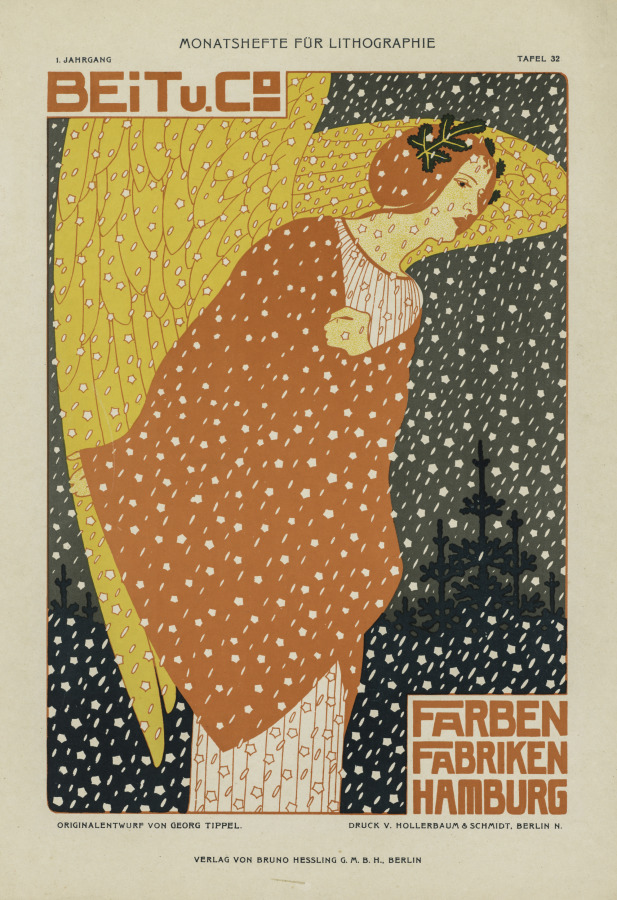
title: Angel in the Snow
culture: Germany, 19th-20th century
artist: Georg Tippel (German, 1875–1915)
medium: color lithograph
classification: Print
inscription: In plate, above image (L to R): 1. Jahrgang, Monatshefte Fur Lithographie, Tafel 32; in plate, below image (L to R): Originalentwurf von Georg Tippel, Druck V. Hollerbaum & Schmidt, Berlin N.; on bottom edge: Verlag von bruno hessling G.M.B.H., Berlin